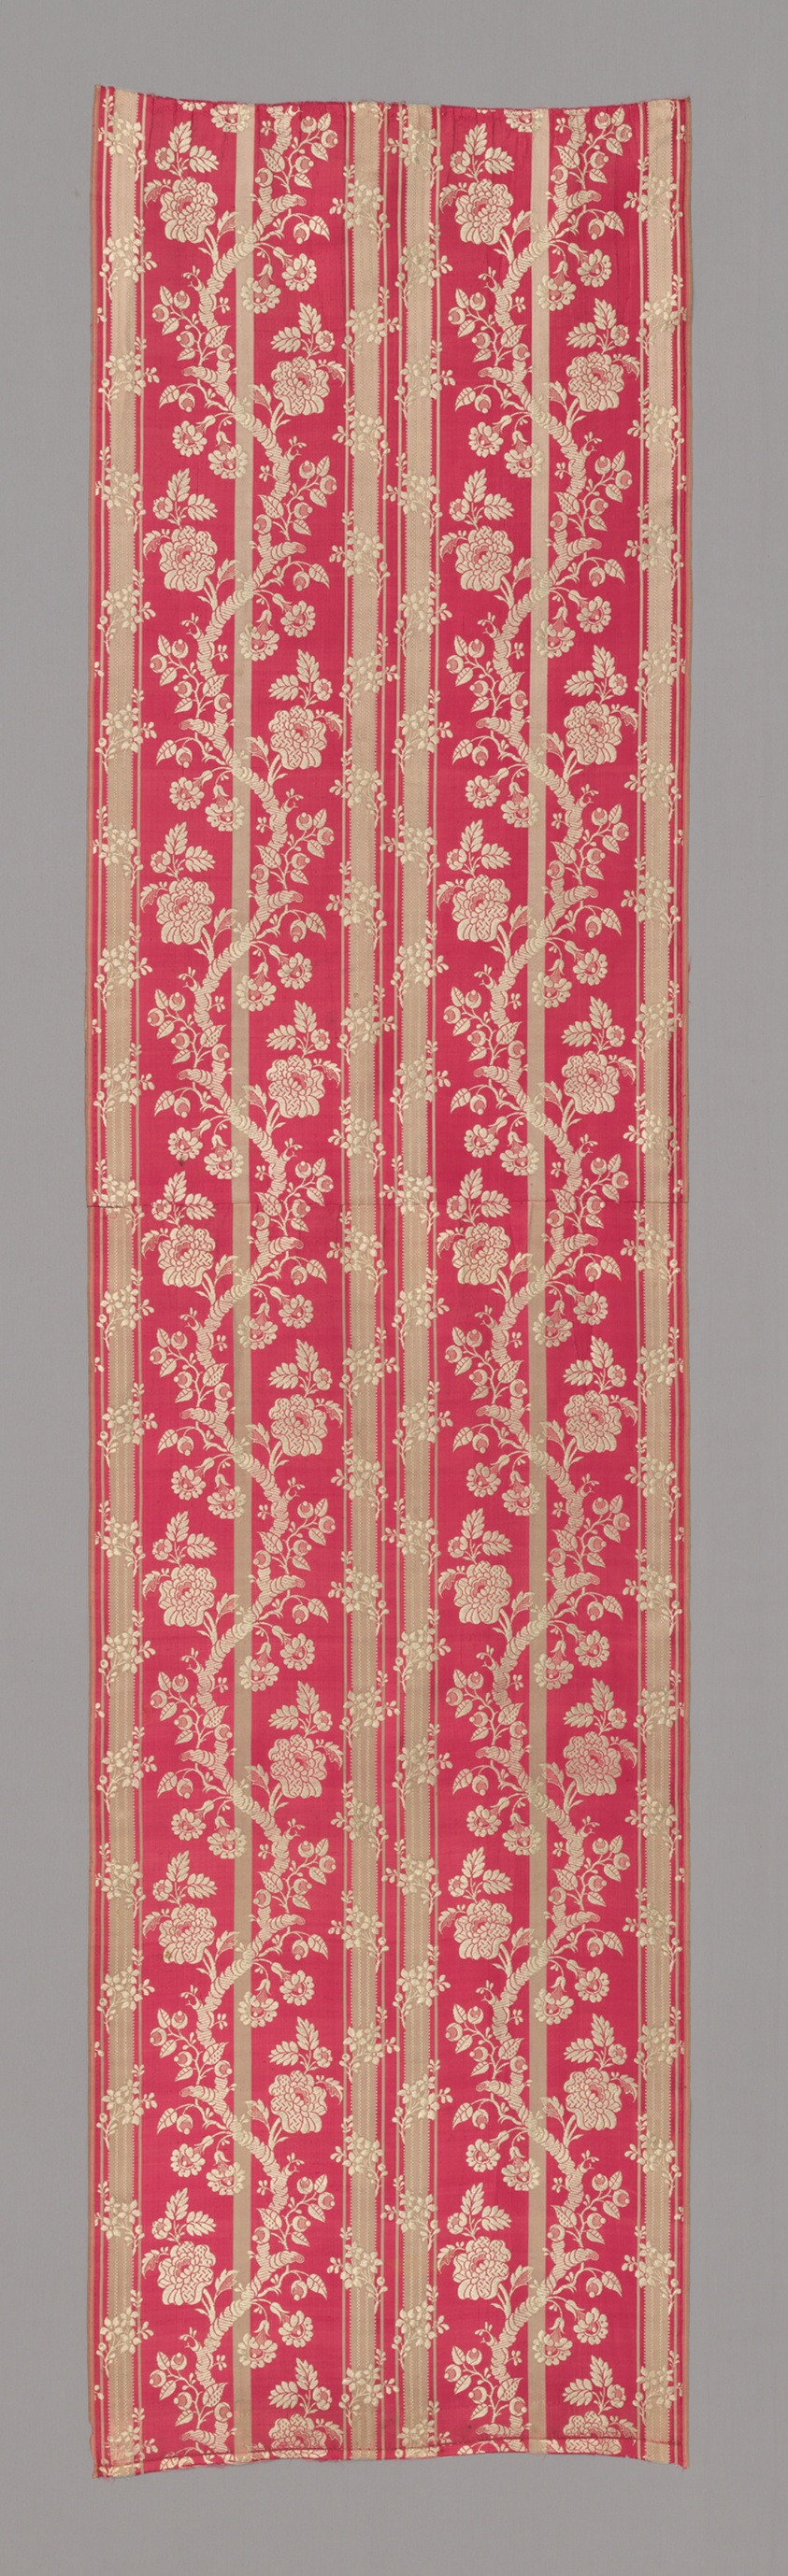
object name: Textile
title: Panel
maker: France, probably Lyon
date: 1750/1800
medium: Silk, stripes of warp-float faced 7:1 satin weave and of plain weave with complementary ground weft patterning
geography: France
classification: textile; weaving